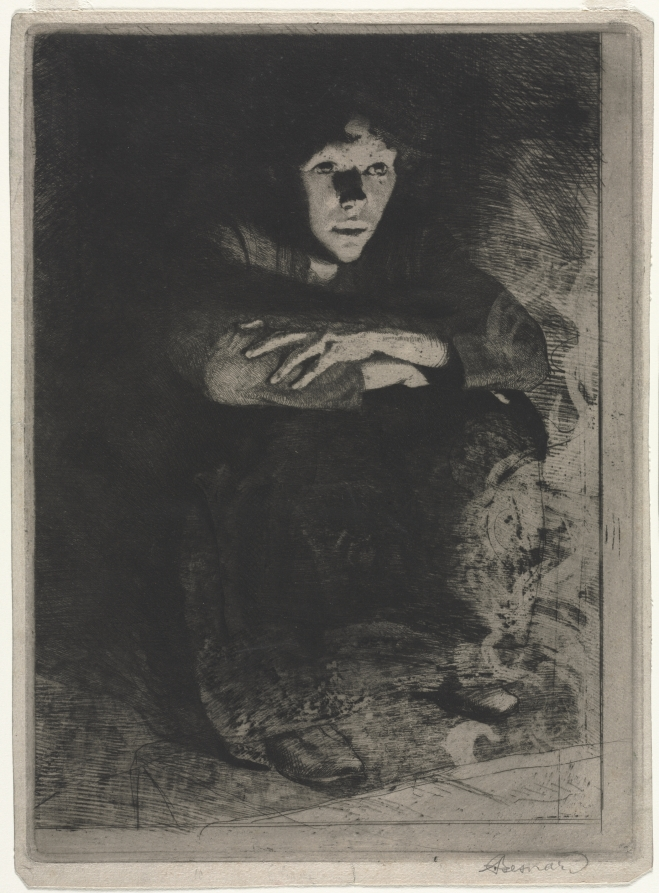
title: In the Ashes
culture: France, 19th century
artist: Albert Besnard (French, 1849–1934)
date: 1887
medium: etching, drypoint and roulette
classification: Print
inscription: signed, lower right, in pencil: A Besnard